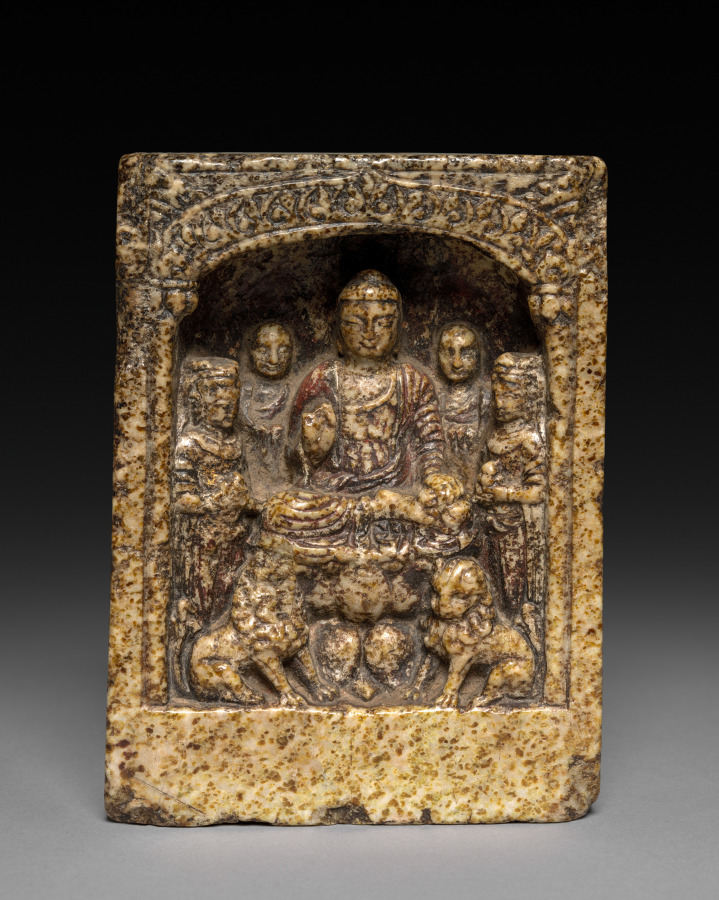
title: Sakyamuni Preaching: A Votive Stele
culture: China, Northern Dynasties period (386–581 CE), Northern Zhou (557-581)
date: c. 565 BCE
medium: Serpentinite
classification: Sculpture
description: The stele shows the historic Buddha Sakyamuni preaching, his lotus throne being flanked by lions, two attendants, and two disciples. There is a date and inscriptions on both sides of the stone.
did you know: Originally the figures and background were painted; traces of red and black remain. The figures’ clothing and some exposed skin were gilded.